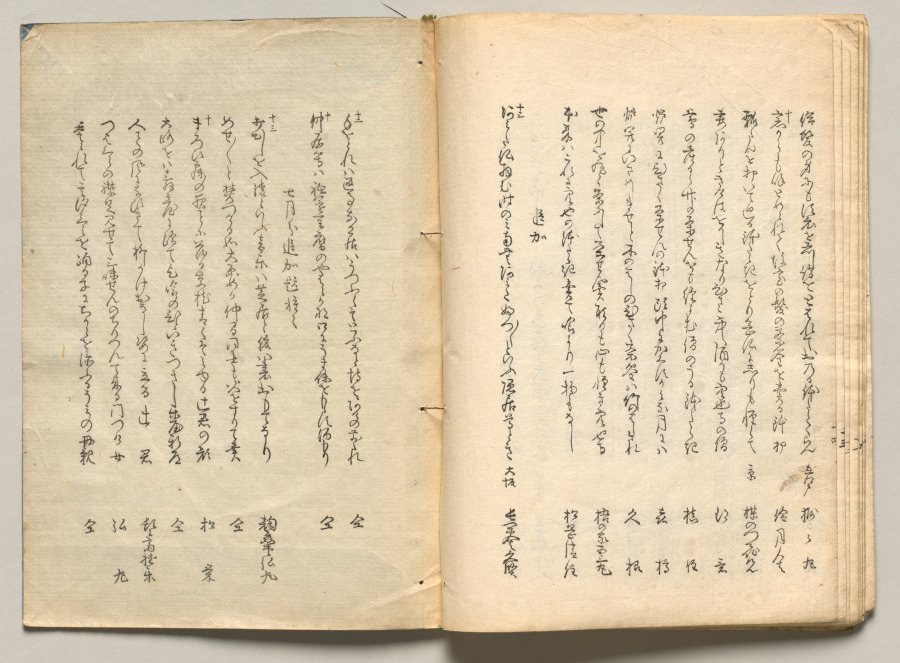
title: Spread Twenty-Three from Volume Four of People of Japan in Light Verse (Kyōka)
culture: Japan, Edo period (1615–1868)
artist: Utagawa Hiroshige (Japanese, 1797–1858)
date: 1857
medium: Woodblock-printed book; ink and color on paper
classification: Bound Volume